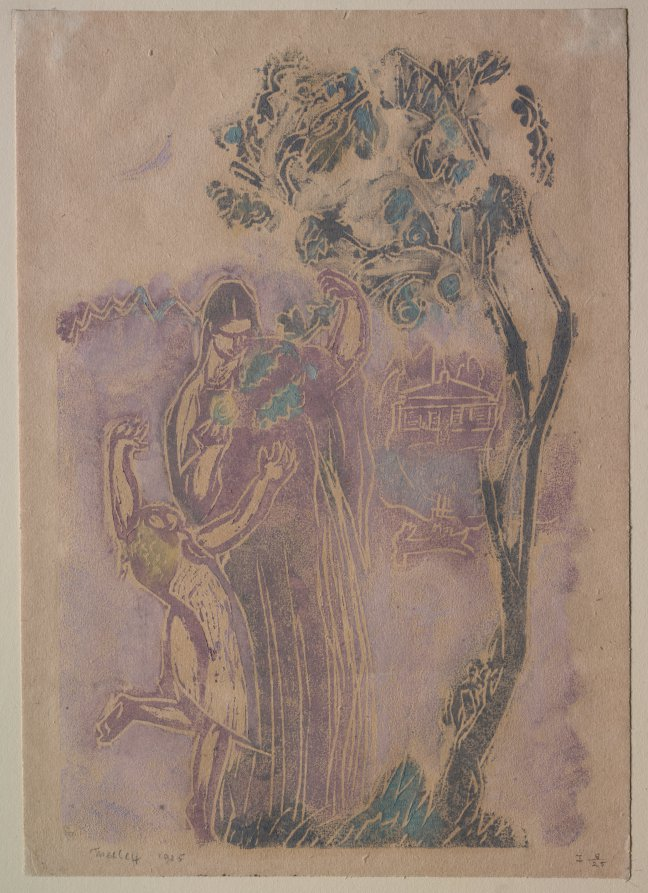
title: In a Garden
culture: Finland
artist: Ellen Thesleff (Finnish, 1869–1954)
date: 1925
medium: color woodcut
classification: Print